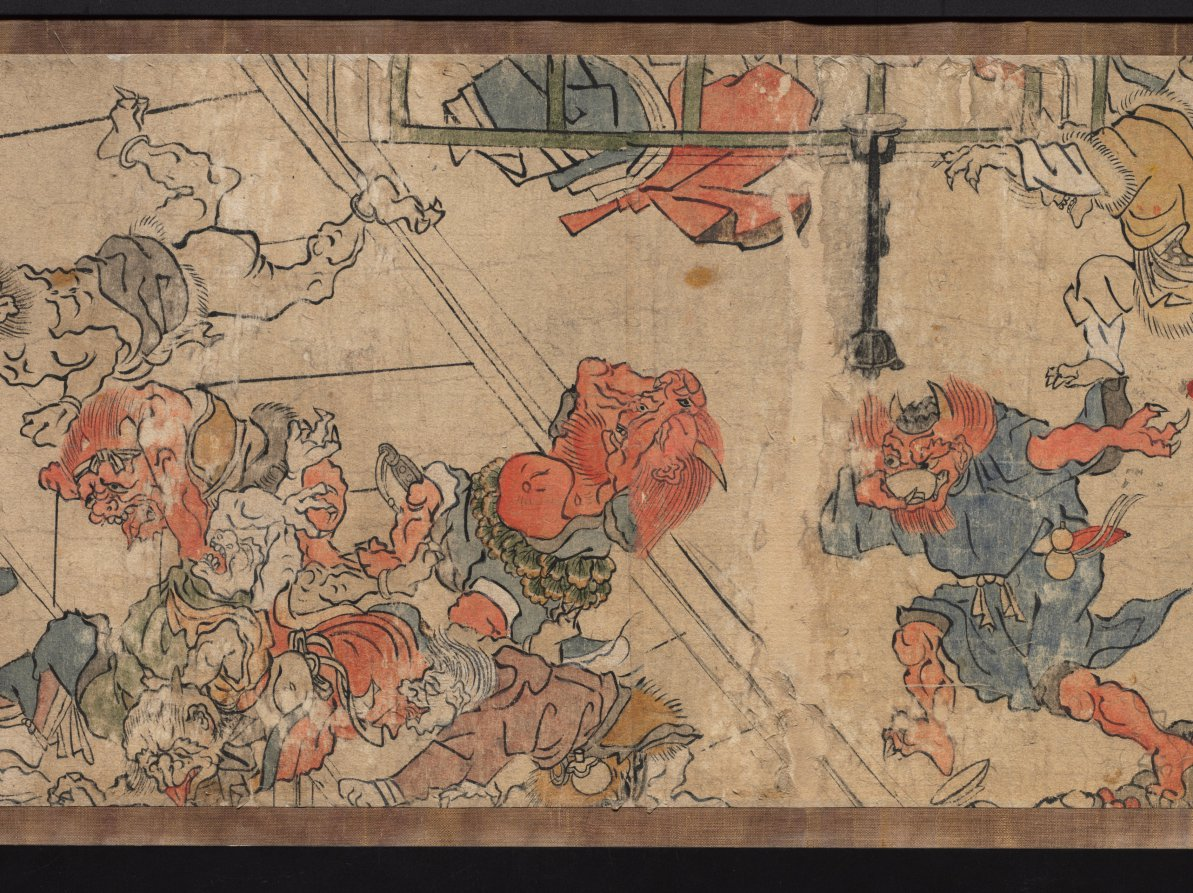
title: Oeyama Engi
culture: Japan, Edo period (1615–1868)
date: 1615–1868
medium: one of a pair of handscrolls; ink and color on paper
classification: Painting